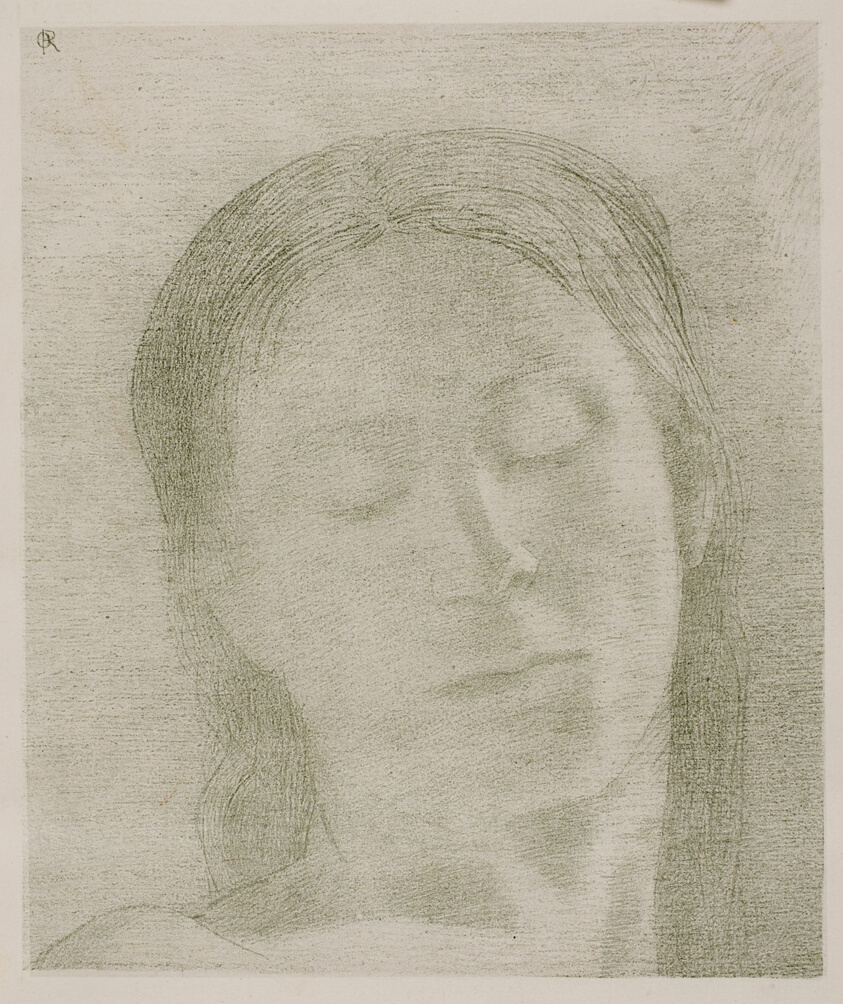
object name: Print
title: Closed Eyes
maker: Odilon Redon (French, 1840-1916)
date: 1890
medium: Lithograph in green on ivory wove paper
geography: France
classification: lithograph; print; prints and drawing; paper